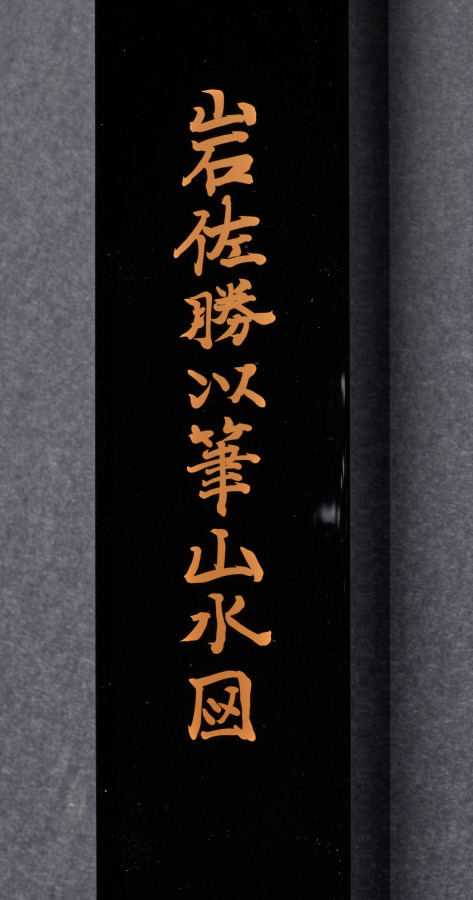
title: Coastal Landscape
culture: Japan, Momoyama period (1573–1615)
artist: Iwasa Matabei (Japanese, 1578–1650)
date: 1573–1615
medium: hanging scroll; ink on paper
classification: Painting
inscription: signed: signature unread